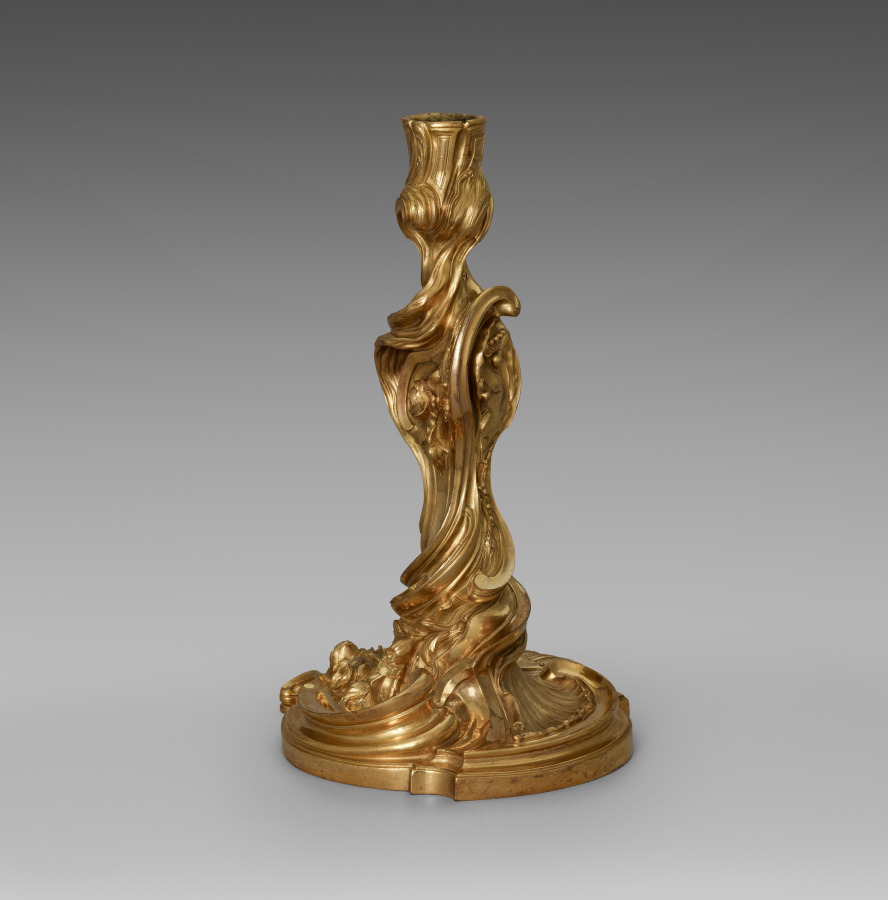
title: Candlestick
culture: France, 18th century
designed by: Juste-Aurèle Meissonnier (French, 1695–1750)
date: c. 1740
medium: gilt metal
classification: Furniture and woodwork